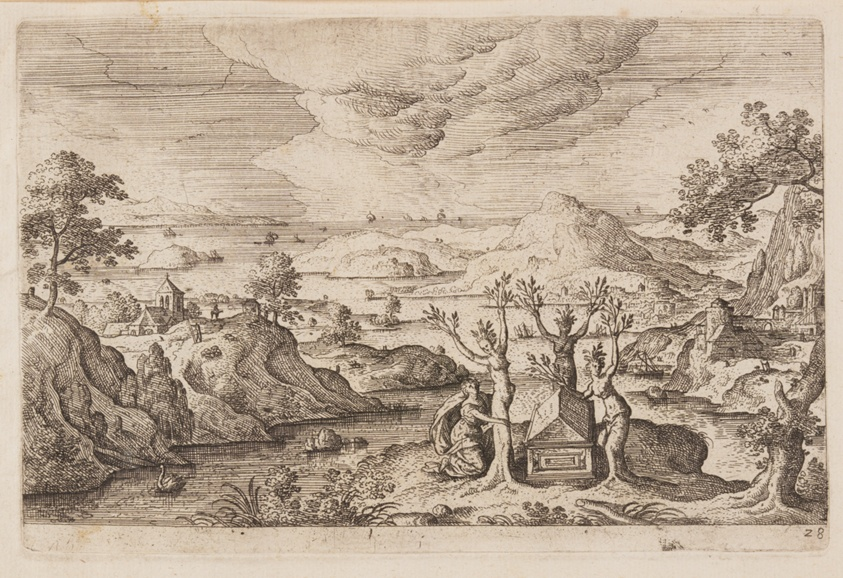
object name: Print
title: Plate 28, from Landscapes with Scenes from the Old and New Testament and Ovid’s Metamorphoses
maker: Hans Bol (Flemish, 1534–1593); published by Philip Galle (Flemish, 1537–1612)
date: 1574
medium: Etching on ivory laid paper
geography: Flanders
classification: print; paper; prints and drawing; etching